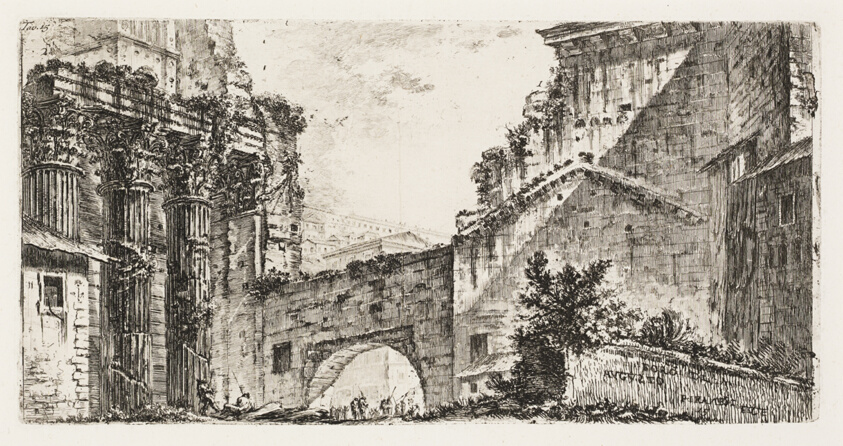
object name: Print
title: Forum of Augustus, plate 15 from Some Views of Triumphal Arches and other monuments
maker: Giovanni Battista Piranesi (Italian, 1720-1778)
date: 1748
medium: Etching on ivory laid paper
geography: Italy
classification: etching; print; prints and drawing